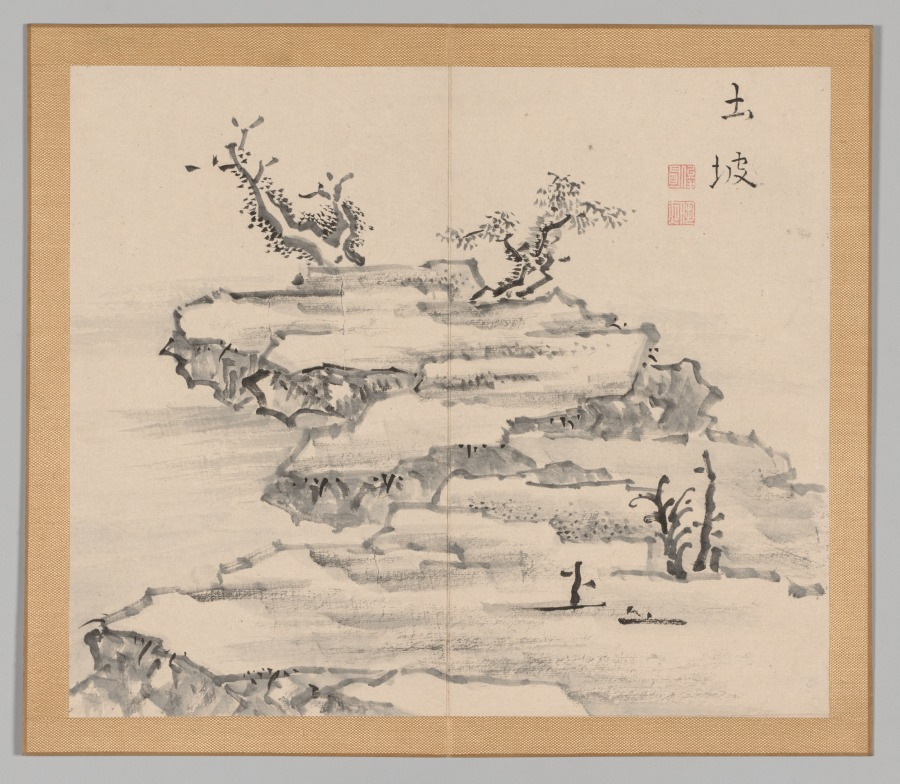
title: Reverberations of Taiga, Volume 1 (leaf 21)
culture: Japan, Edo period (1615–1868)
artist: Aoki Shukuya (Japanese, d. 1802)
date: mid- to late 1700s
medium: double-leaf from a pair of albums; ink and light color on paper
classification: Portfolio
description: Traditionally, young painters in Japan began their studies with an established master-painter. The master's compositions invariably became models that the apprentice copied to learn various ink and brush techniques. Shukuya was a pupil of the famous Kyoto artist Ikeno Taiga, whose style is reflected in these sketches of rocks, trees, and mountains.